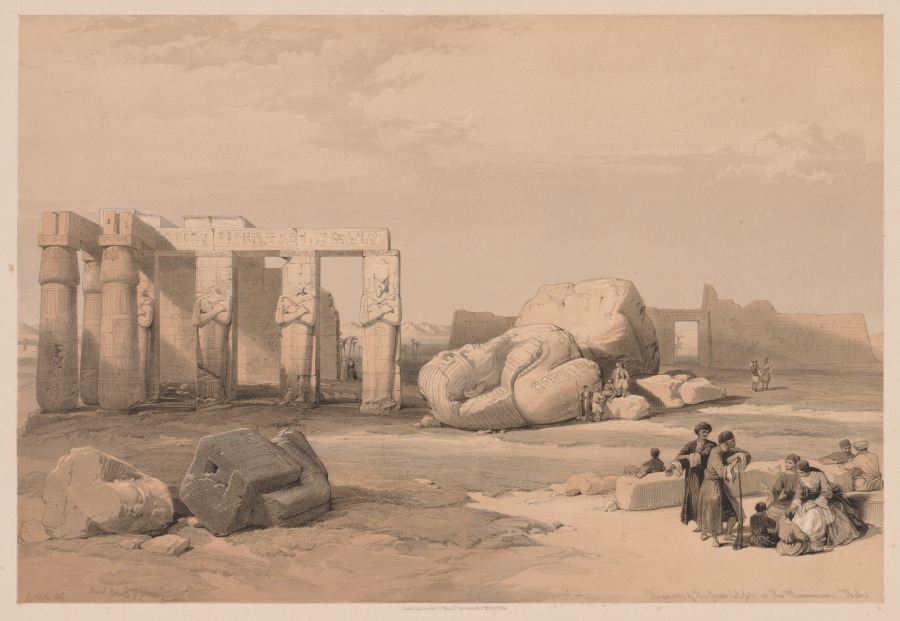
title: Egypt and Nubia: Volume II - No. 4, Fragments of the Great Colossi, at the Memnonium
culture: England, 19th century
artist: Louis Haghe (British, 1806–1885)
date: 1838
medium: color lithograph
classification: Print